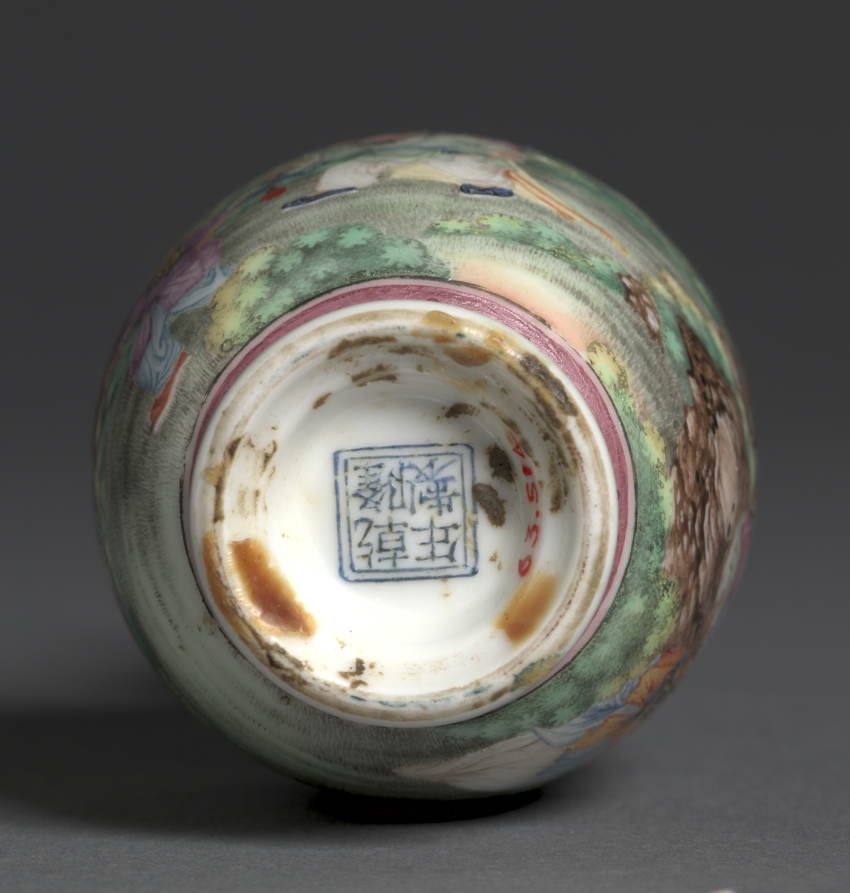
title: Vase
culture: China, Qing dynasty (1644-1911), Qianlong mark and reign (1736-95)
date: 1736–95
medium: Porcelain with decoration in colored fa-lang enamels, Guyuexuan ware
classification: Ceramic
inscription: 乾隆年製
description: The four-character mark on the base of this vase indicates that it was made in Jingdezhen and then sent to Beijing to be decorated in the imperial workshops by painters who were trained in using Western perspective and shading.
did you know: The child in orange has a bun above his ear, while the rest of his head is clean-shaven, like the other children’s.